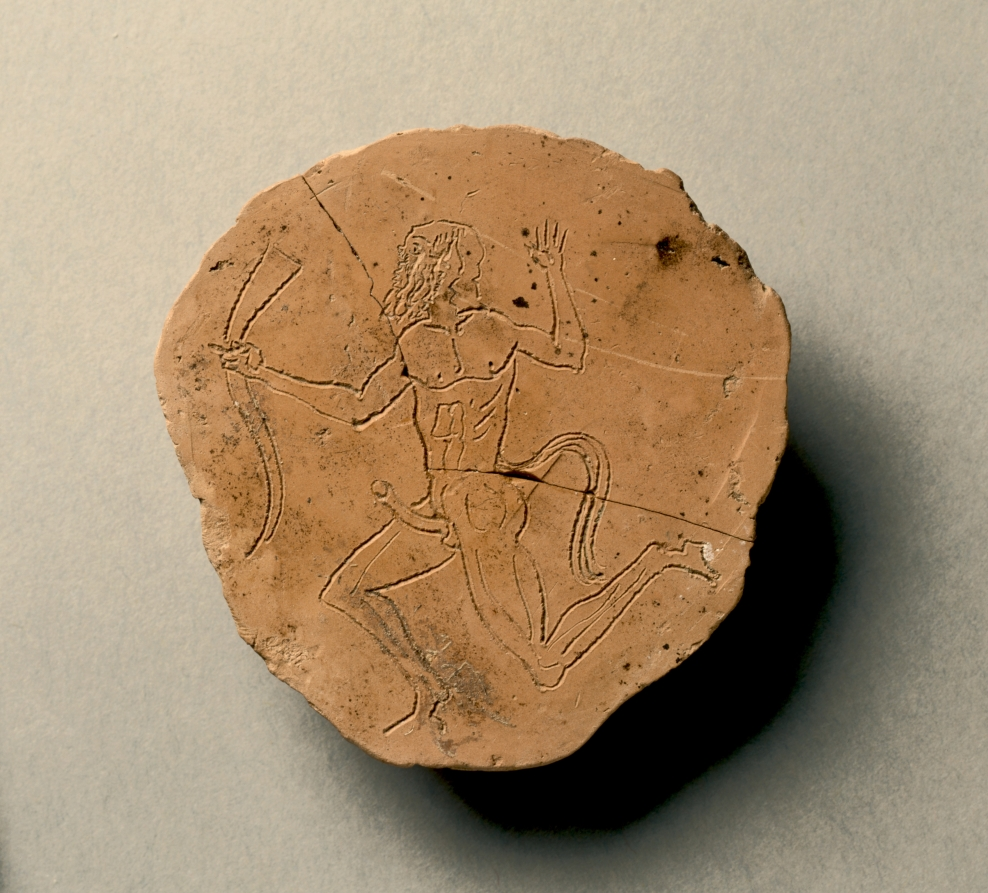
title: Gorgoneion Plaque with Incised Figure of a Dancing Satyr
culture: Greece, South Italy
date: c. 525–475 BCE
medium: terracotta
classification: Sculpture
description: Probably meant to decorate the outside of a wooden coffin or other tomb furniture, this small mold-made terracotta plaque is one of two in the collection (click here for the other). Both bear gorgoneia, or frontal Gorgon faces, with snaky hair, sharp teeth, and protruding tongue, perhaps meant to ward off evils. Curiously, this plaque also features decoration on its back side, in the form of a spirited dancing satyr incised into the clay before firing. Since this satyr would not have been visible once the plaque was in place, its purpose is uncertain. Was it simply diversion for the artisan who made it, or meant to protect the spirit of the deceased?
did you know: This plaque includes a very rare ancient sketch: a satyr incised on the reverse surface.